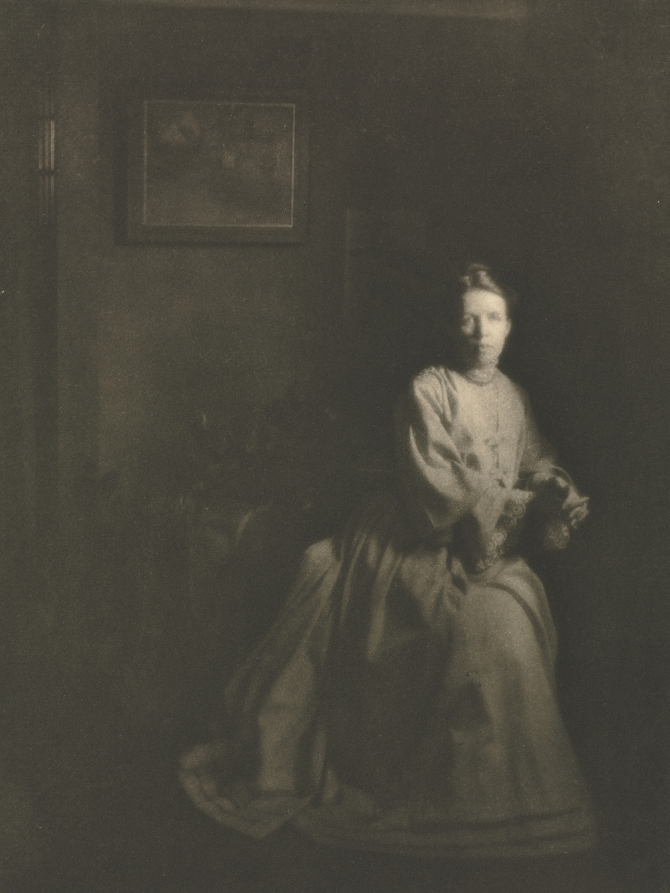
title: Camera Work: Portrait - Mrs. Clarence H. White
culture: America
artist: Clarence H. White (American, 1871–1925)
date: 1908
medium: photogravure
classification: Bound Volume